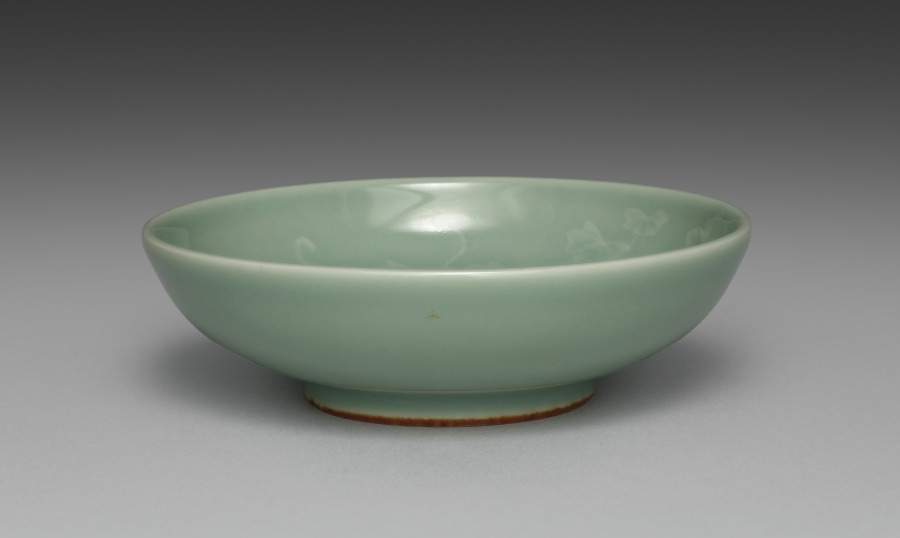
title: Dish from Dishes with Ivy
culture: Japan, Meiji period (1868–1912)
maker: Seifū Yohei III (Japanese, 1851–1914)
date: 1893–1914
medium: One from a set of five dishes; porcelain with green glaze and molded designs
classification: Ceramic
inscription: 清風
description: Yohei III’s main output for his sophisticated clientele was in the form of tea sets and dining sets. He often produced in pairs, sets of five, or sets of ten. This set of five dishes with a green glaze and designs of ivy vines in very low relief has unfortunately lost its box. These dishes are slightly larger than the other dishes, like CMA 2022.187, and so may have been not saucers but rather small plates for meals.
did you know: In his career, Seifū Yohei III created a range of dishes in green glazes.